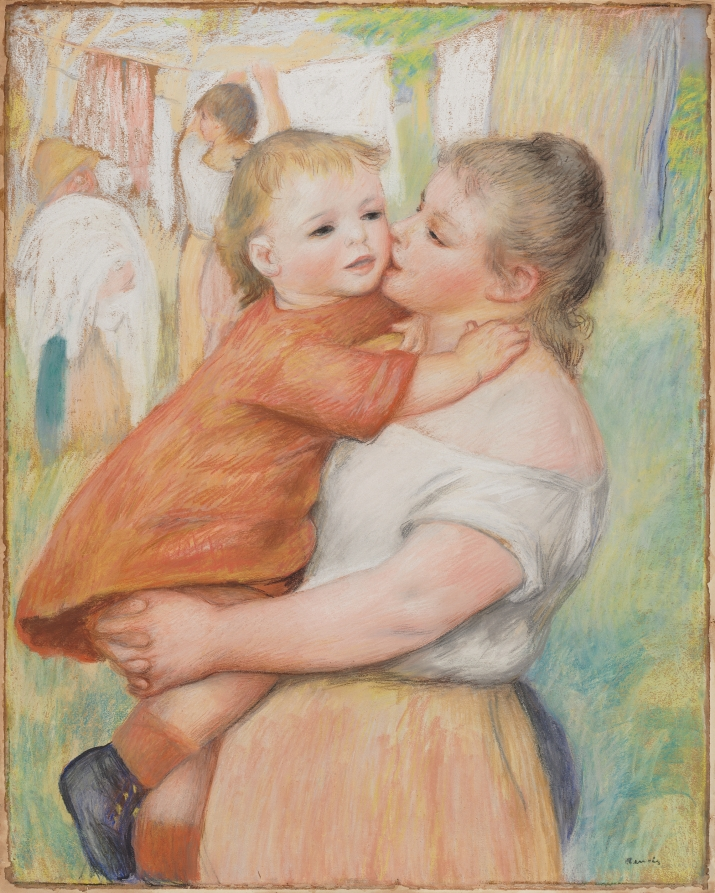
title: Laundress and Her Child (Aline and Pierre)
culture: France, 19th century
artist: Pierre-Auguste Renoir (French, 1841–1919)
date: c. 1886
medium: pastel on brown paper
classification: Drawing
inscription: stamped, lower right, in black ink: Renoir [Lugt 2137b]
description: In this idealization of motherhood and rural life, Auguste Renoir depicted his future wife, Aline Charigot, with their son Pierre. Bright colors, including warm orange and yellow, are contrasted with cool blues and greens to create a dramatic impact. Renoir took full advantage of pastel’s unique optical properties, in which minute, irregular particles diffusely reflect light, allowing for an unparalleled velvety brilliance that is perfectly suited to portray the youthful bloom of the woman and child.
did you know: Auguste Renoir also realized this composition as a painting in oil on canvas which is in the collection of the Barnes Foundation today.